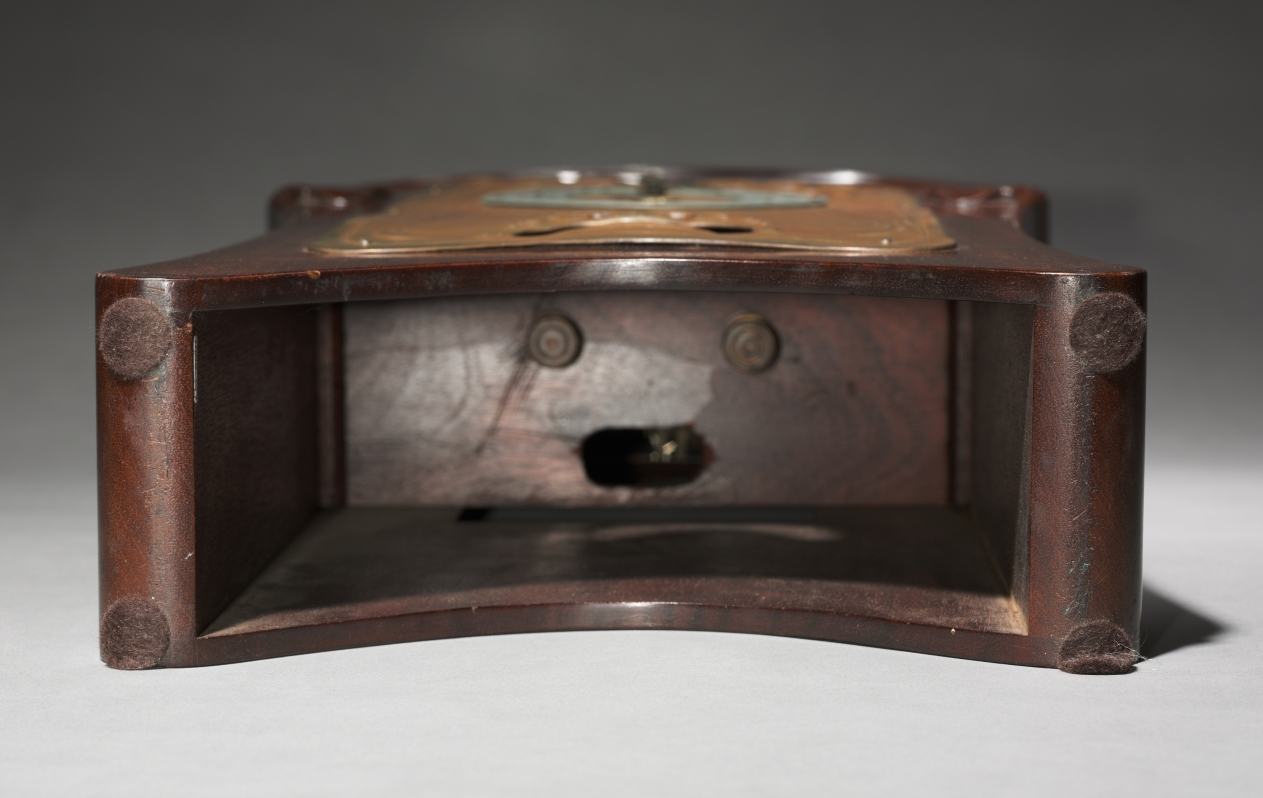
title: Mantle Clock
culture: America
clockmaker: Lenzkirch Clock Factory (German)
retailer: Tiffany & Co. (America, New York, est. 1837)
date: 1901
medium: brass, mahogany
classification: Wood